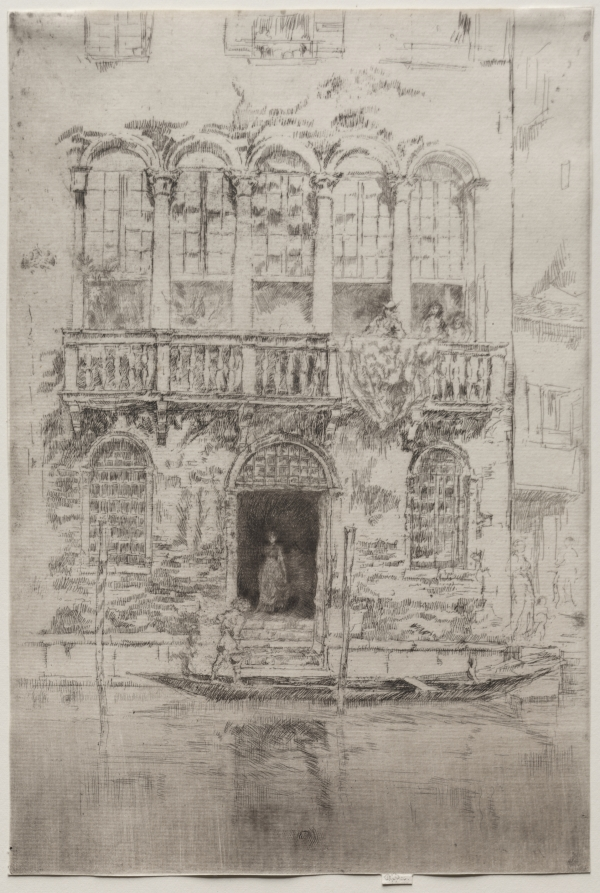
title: The Balcony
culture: America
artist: James McNeill Whistler (American, 1834–1903)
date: c. 1880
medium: etching and drypoint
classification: Print